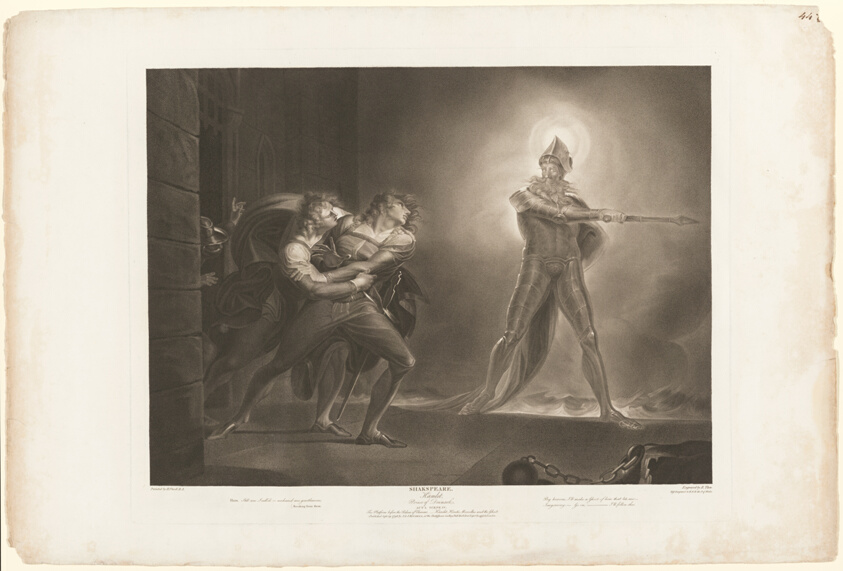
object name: Print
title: Hamlet, Horatio, Marcellus and the Ghost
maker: Robert Thew (English, 1758-1802); after Henry Fuseli (Swiss, active in England, 1741-1825); published by John Boydell (English, 1719-1804); authored by William Shakespeare (English, 1564-1616)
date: 1796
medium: Etching and stipple on ivory wove paper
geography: England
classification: engraving; print; prints and drawing